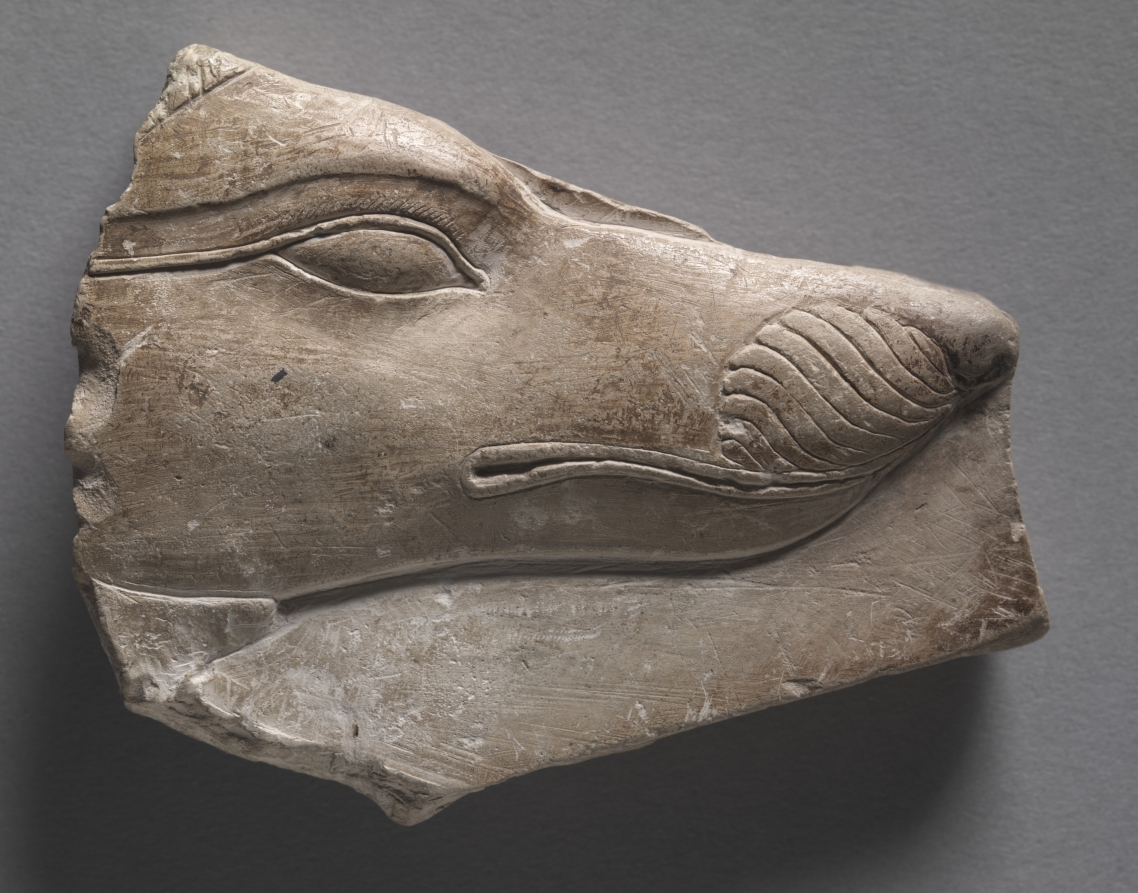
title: Double-Sided Votive Relief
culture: Egypt, Greco-Roman period (332 BCE–395 CE), Ptolemaic dynasty (305–30 BCE)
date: 305–30 BCE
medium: limestone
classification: Sculpture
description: Trial pieces—carved on limestone flakes, or ostraca—and sculptors' models allow us to see how the ancient Egyptian artist approached his work. Showing a wild dog's head on one side and a profile figure on the other, these pieces are masterpieces in their own right, and were probably meant to be copied.